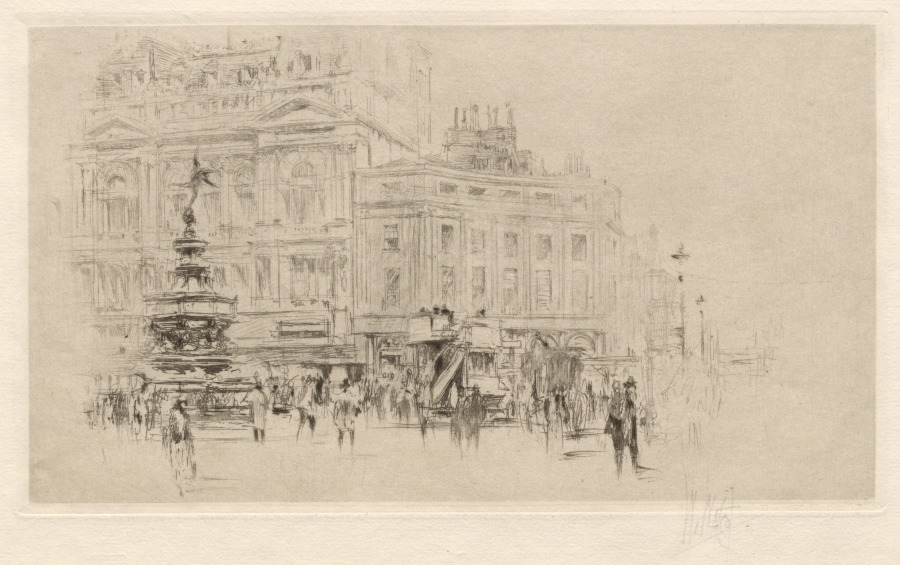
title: Picadilly Circus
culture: England, 20th century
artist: William Walcot (British, 1874–1943)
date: 1913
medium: etching and aquatint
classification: Print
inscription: Lower right, in graphite: W. Walcot